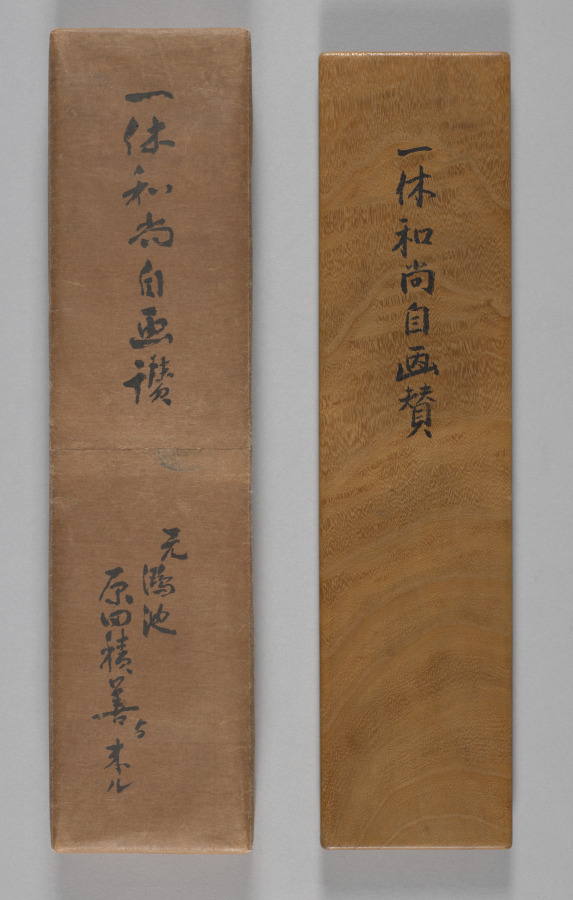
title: Listening to the Wind in the Pines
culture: Japan, Muromachi period (1392–1573)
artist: Ikkyū Sōjun (Japanese, 1394–1481)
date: 1400s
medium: hanging scroll; ink on paper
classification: Painting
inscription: 山居僧聴松風/何須臨済徳山禅一箇住山/三十年公案工夫了畢後/長松風静罷参眠 (transcribed by Trevor Menders with Zheng Xiaoying 2017, revised by Osvaldo Mercuri 2021)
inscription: 紫野龍寶門客东海純一休老和尚畫と詩一筆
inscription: 落款 一休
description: A monk sits in contemplation below an overhang covered with pine. The poem, titled "Monk in the Mountains Listening to the Wind in the Pines," refers to two Chinese Chan (Zen) Buddhist monks active in the ninth century. It may be translated as follows: Why must the Zen of Rinzai (Linji Yixuan) and Tokusan (Deshan Xuanjian) reside in a single temple for thirty years? Once he's solved his kōan, (the monk) ends his practice and falls asleep in the quietness of the wind among the tall pines. (translated by Osvaldo Mercuri) According to an inscription following the poem, both painting and verse were done by an eminent Japanese Buddhist monk known for revitalizing the Kyoto temple Daitokuji.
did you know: The word mountain, appearing in the title to the poem on this painting, can also refer to a temple.